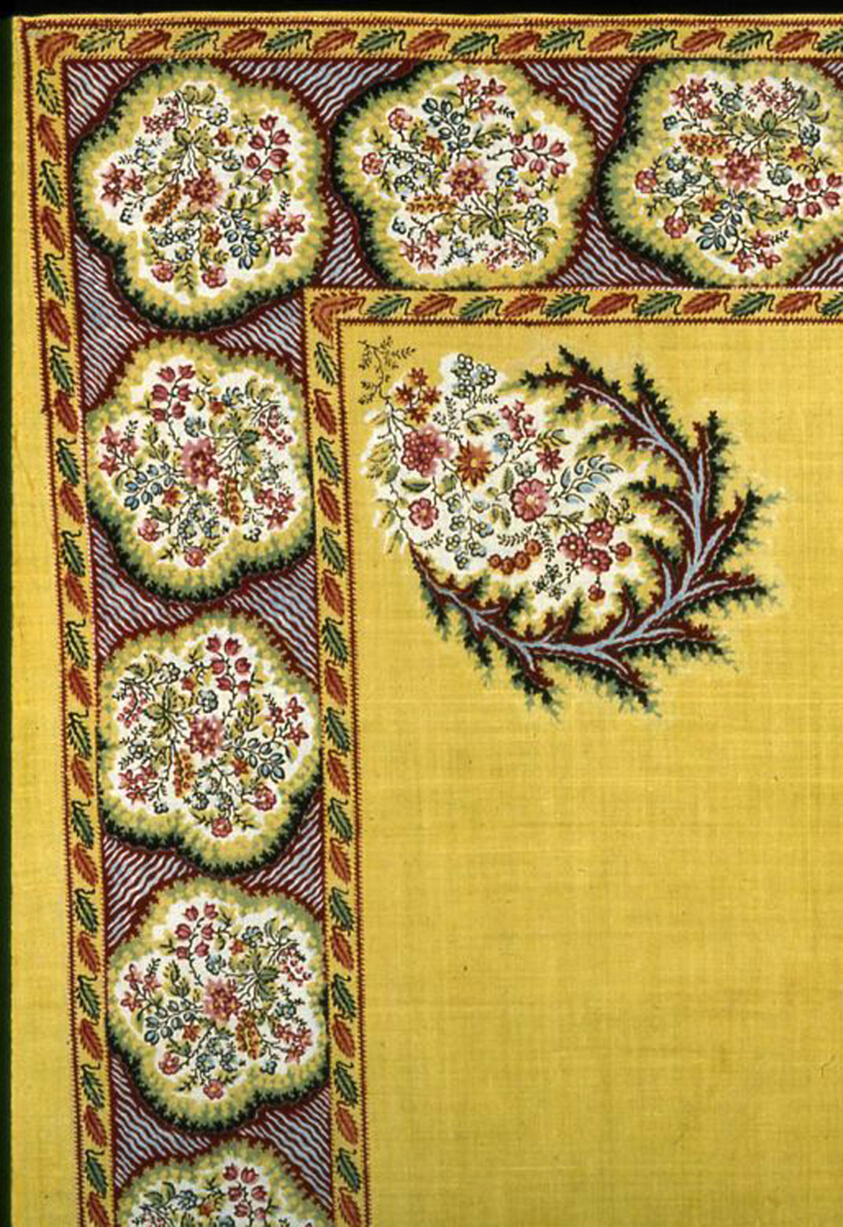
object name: Textile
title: Handkerchief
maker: France, Alsace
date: c. 1870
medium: Cotton, plain weave; printed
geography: France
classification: textile; weaving - printed; accessories (object genre)